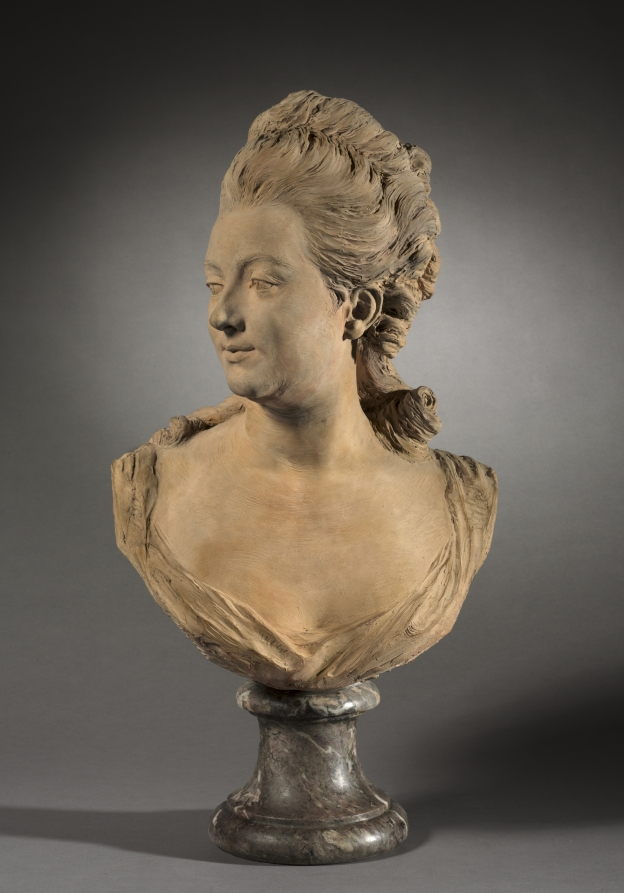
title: Portrait of Melle de Vandeul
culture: France, 18th century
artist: Jean-Baptiste Lemoyne (French, 1704–1778)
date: possibly 1760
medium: terracotta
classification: Sculpture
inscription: Signed underneath shoulder: J. B. Lemoyne (incised).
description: Lemoyne specialized in portrait busts of wealthy Parisians. In this case, the sitter is a close relative of important French critic and writer Denis Diderot.